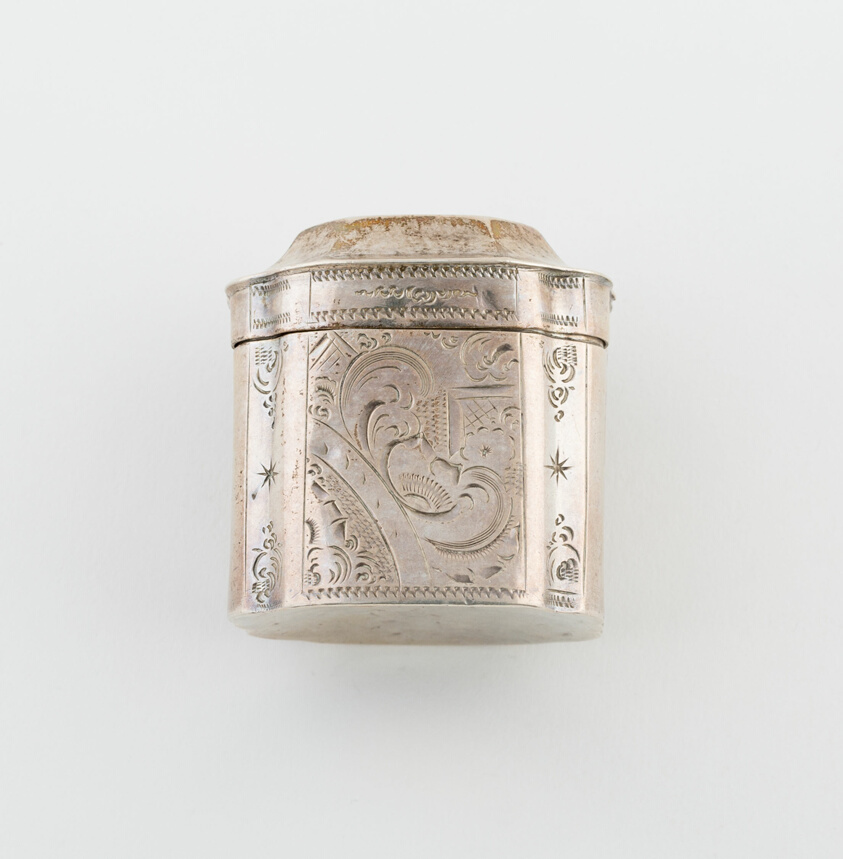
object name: Metalwork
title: Sponge Box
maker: Probably Cornelis van Gelderen Pz.; Dutch, active c. 1840-c. 1874; Probably Schoonhoven, Netherlands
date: 1855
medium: Silver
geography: Netherlands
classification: container for personal use; box; european decorative arts; metalwork; silver; decorative object/ornament